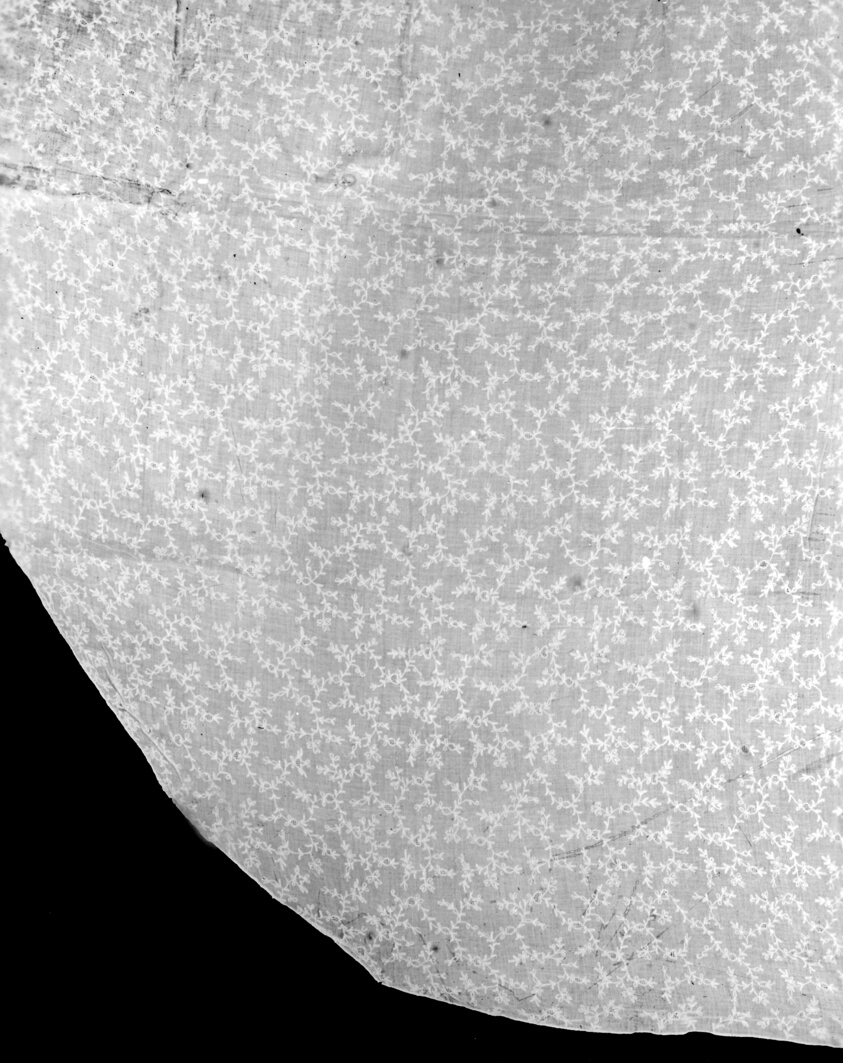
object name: Textile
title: Veil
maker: France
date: c. 1805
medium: Cotton, plain weave; embroidered with cotton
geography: France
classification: textile; needlework (visual works)